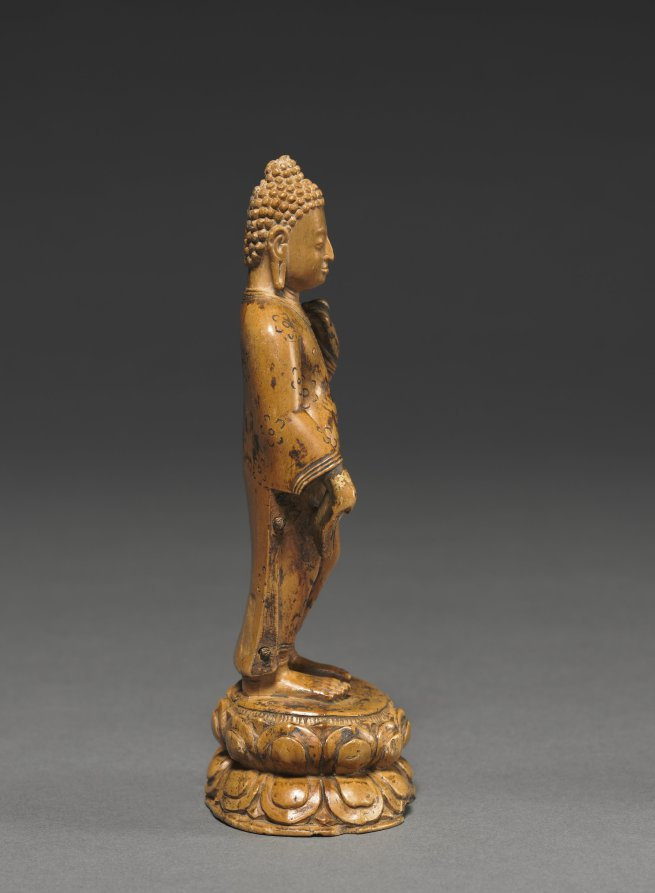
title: Standing Buddha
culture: Burma (Myanmar)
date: c. 800s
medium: Kaolin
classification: Sculpture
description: This small sculpture was probably part of a set of eight main scenes from the life of the Buddha, each identified by a specific hand gesture. When the standing Buddha gestures down with his right hand, with the palm facing out, he usually signals his miraculous descent from the Heaven of the Thirty-three Gods, where he once spent a monsoon season giving teachings to his mother. She died shortly after his birth and was reborn in the heaven.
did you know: The robe is covered with flowers on the front and back, possibly alluding to the flowers falling from heaven as the Buddha descended back to earth.